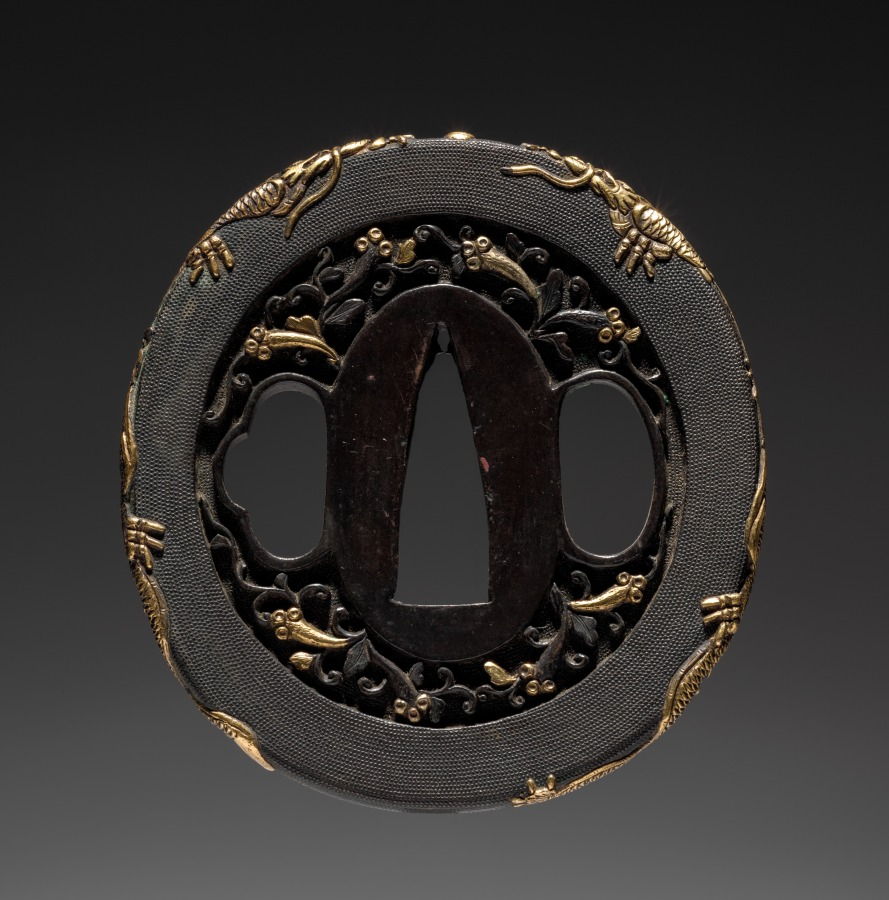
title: Sword Guard (Tsuba)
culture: Japan, possibly Edo period (1615–1868)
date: c. 1615–1868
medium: metal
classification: Arms and Armor